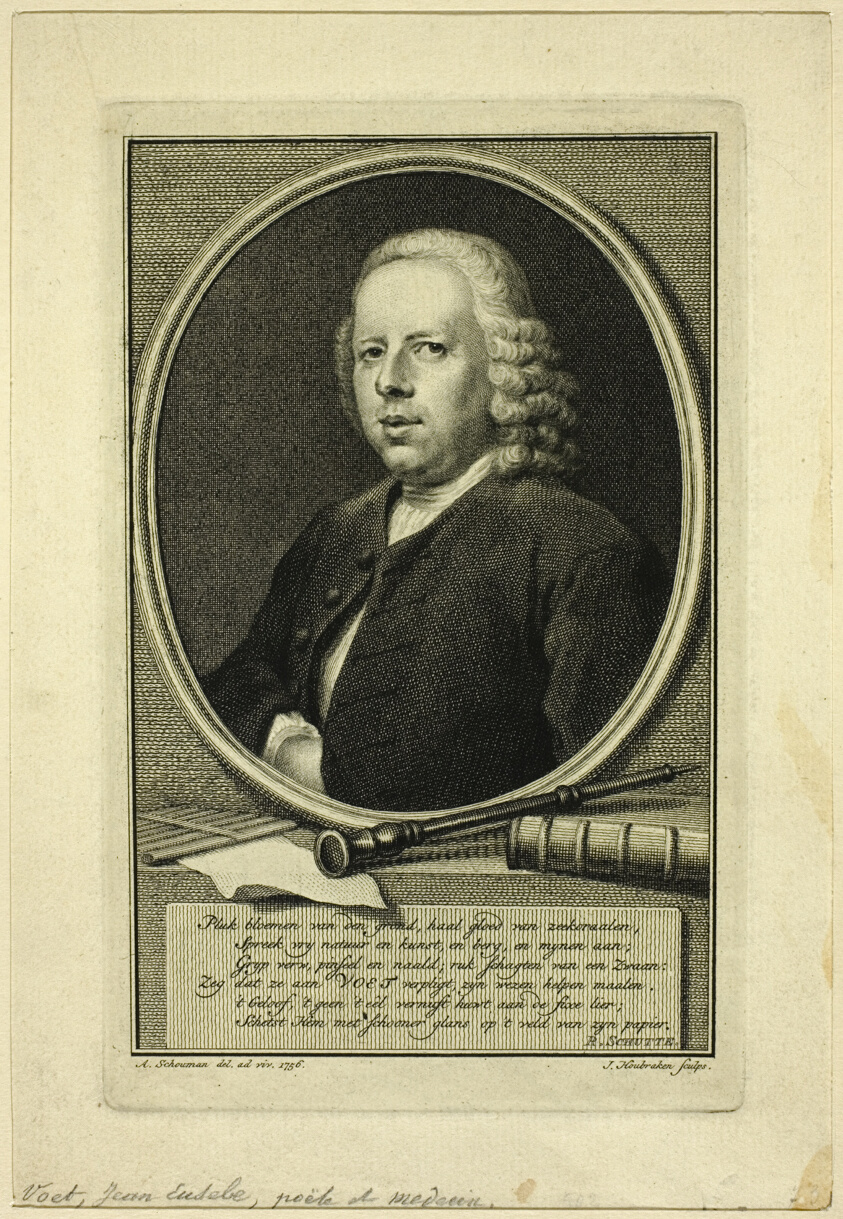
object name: Print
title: Voot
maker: Jacobus Houbraken (Dutch, 1698-1780)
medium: Engraving on paper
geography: Holland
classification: etching; print; prints and drawing